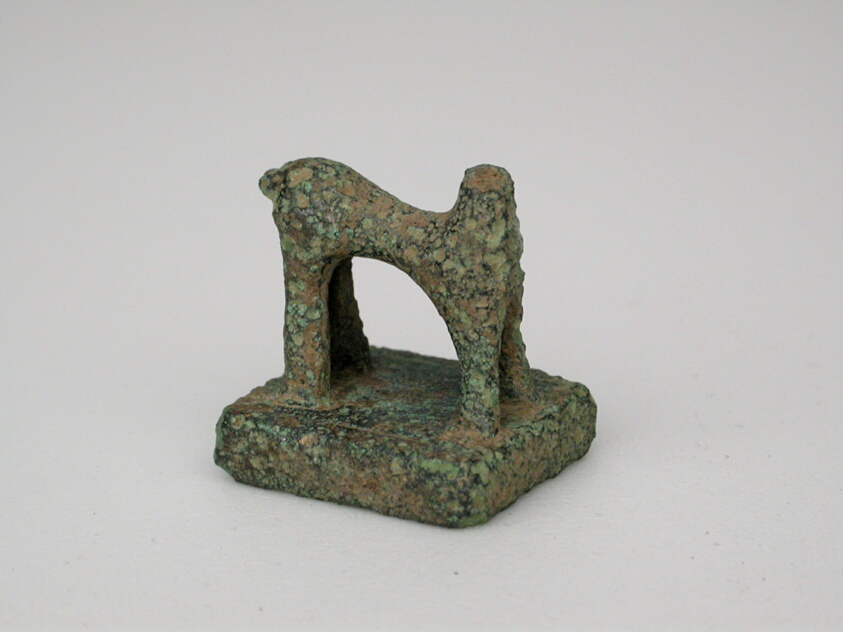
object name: Decorative Arts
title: Seal with Quadruped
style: geometric, ancient, greek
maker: Greek; Thessaly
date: Geometric Period (800–600 BCE)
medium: Bronze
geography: Thessalía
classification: votive offering; seal; ex-voto; decorative arts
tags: animals